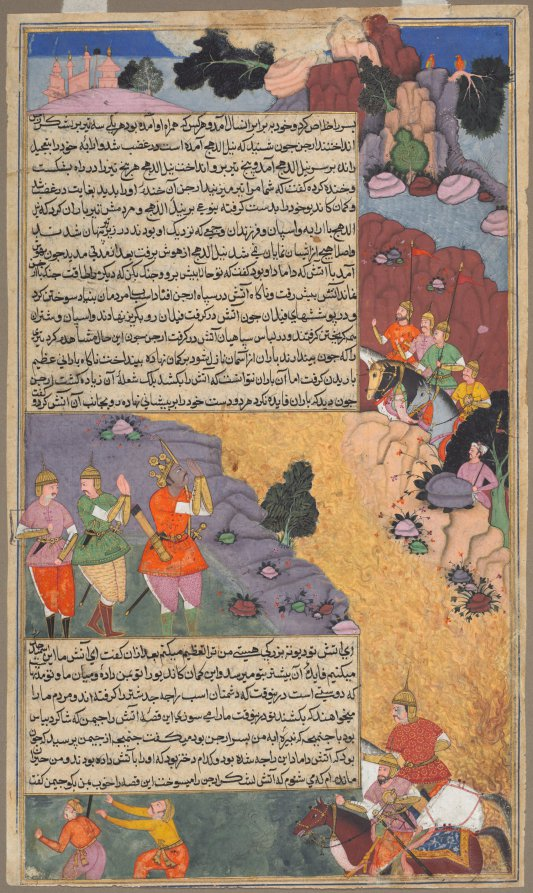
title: The First Adventure of the White Horse, Page from the Khan Khanan's Razm Nama (Book of Wars)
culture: India, Subimperial Mughal school, 17th century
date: c. 1610–17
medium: Gum tempera, ink, and gold on paper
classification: Painting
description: After the five Pandava brothers defeated their cousins, the oldest, who became king, performed an ancient Vedic ritual known as the horse sacrifice in order to determine the physical extent of his rule. For one year a horse wanders freely around the country, attended by warriors, and every land through which the horse passes becomes part of the king’s territory. The warriors go to battle with any local resistance. In this case, the warrior following the horse is Arjuna, one of the five Pandava brothers. He has encountered the son-in-law of the god of fire, Agni, who creates a river of fire to block the warriors. In a dramatic composition set on the banks of the swirling golden river of fire, running diagonally down the page between multicolored rocky outcrops, Arjuna, dark-skinned and crowned, pleads with Agni, the god of fire. He prays that the horse be allowed to pass, saying that the horse sacrifice is in accordance with sacred Vedic injunctions, and that at the end of the year, the horse will be sacrificed to him, the god of fire himself.